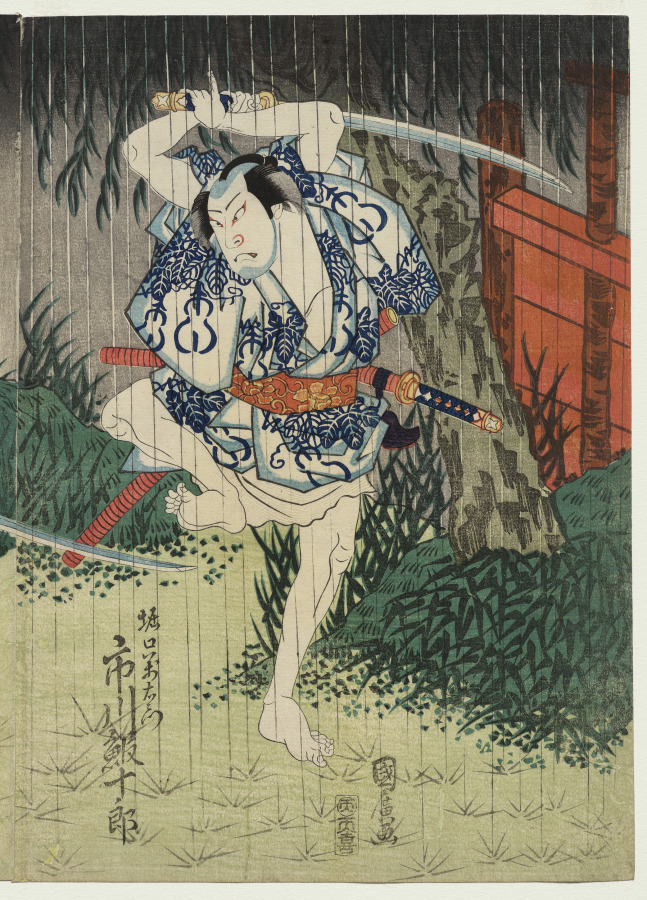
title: Ichikawa Ebijuro II as Horiguchi Manzaemon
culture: Japan, Edo period (1615–1868)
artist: Utagawa Kunihiro (Japanese)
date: 1829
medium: color woodblock print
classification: Print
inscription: Signature: Kunihiro ga Publisher: Temmaya Kihei (Tenki, emblem)